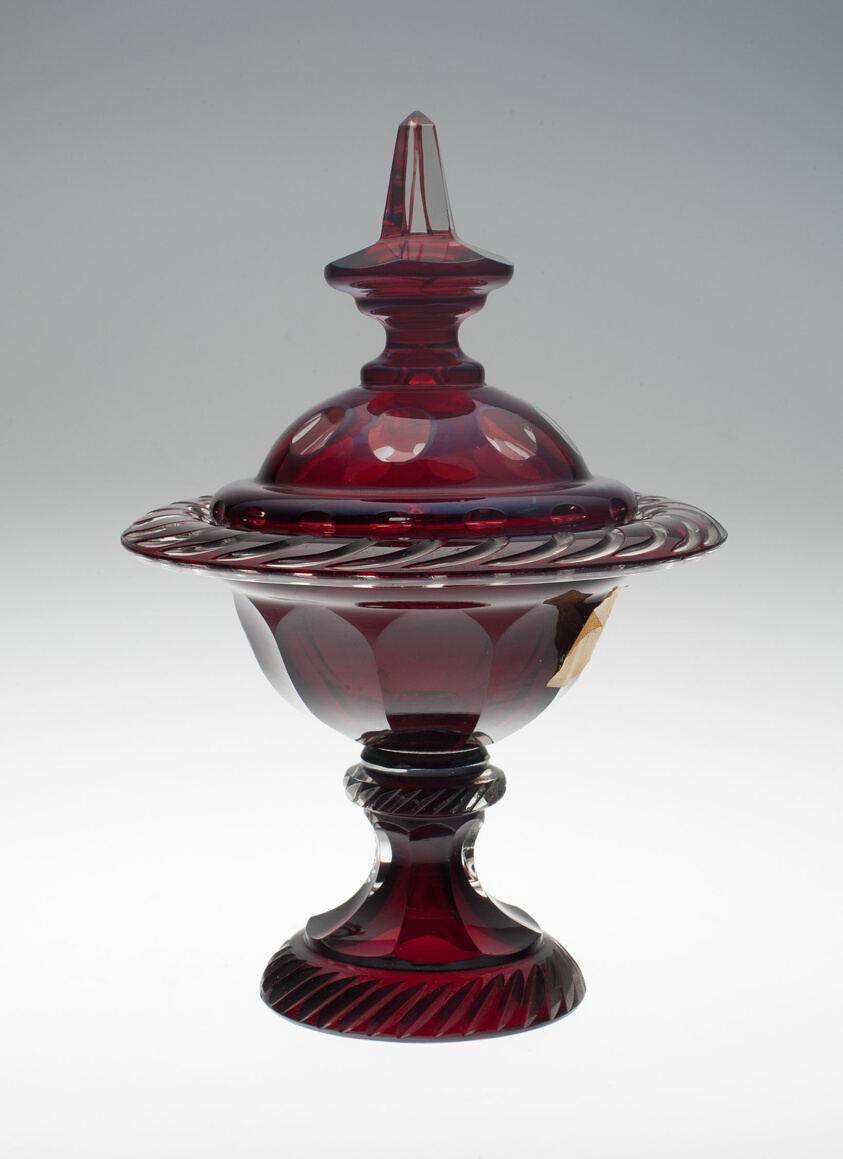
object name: Glass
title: Compote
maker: Bohemia, Czech Republic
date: c. 1850/70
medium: Glass, red, blown and cut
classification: compote; dish (vessel); glass